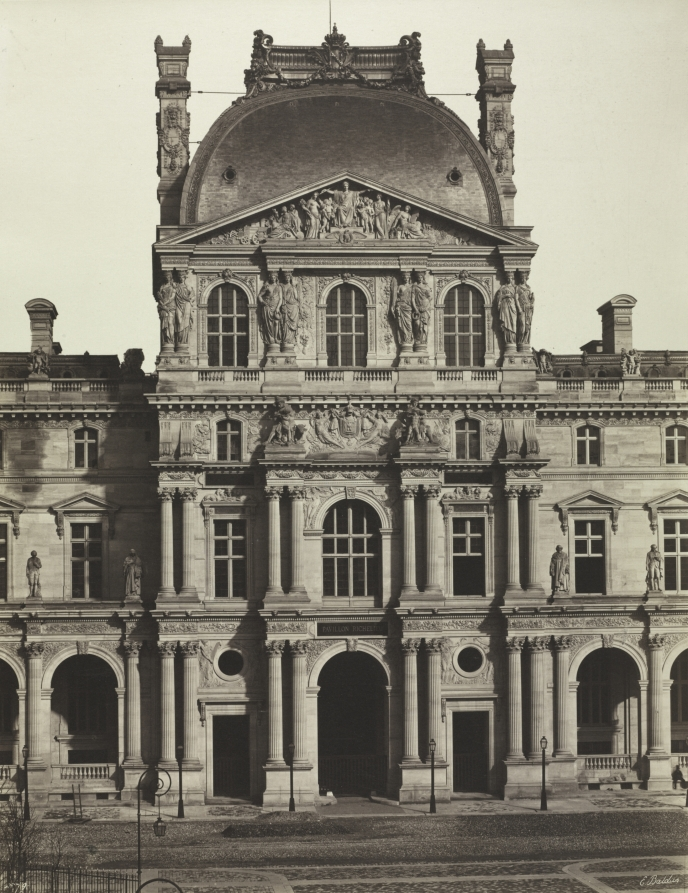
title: Pavilion Richelieu, Louvre, Paris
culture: France, 19th century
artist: Édouard Baldus (French, 1813–1889)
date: 1856–1857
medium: salted paper print, albumenized, from wet collodion negative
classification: Photograph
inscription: Written in negative: "No. 79; E. Baldus"; in black ink on recto: "E. Baldus [signed]"